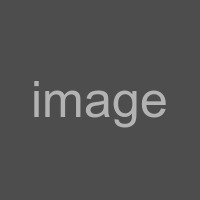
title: Darjeeling. Kinchinjunga and the Snows from Beechwood Park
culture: India, 19th century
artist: Photoglob Co. (Zurich, active c. 1890–1910)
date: 1890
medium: Photochrom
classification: Photograph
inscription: Imprinted in gold on recto in lower left corner: “20059. P.Z-DARJEELING. KINCHINJUNGA/AND THE SNOWS FROM BEECHWOOD PARK”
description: This view looks down at the town of Darjeeling, established in the early 1800s by the British colonial administration at 6,900 feet above sea level and across the foothills at Kinchinjunga, the third highest mountain in the world, which rises to more than 28,000 feet.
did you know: The composition evokes traditions in European landscape painting, not surprising since the photograph was made by Europeans for sale to Europeans and Americans.